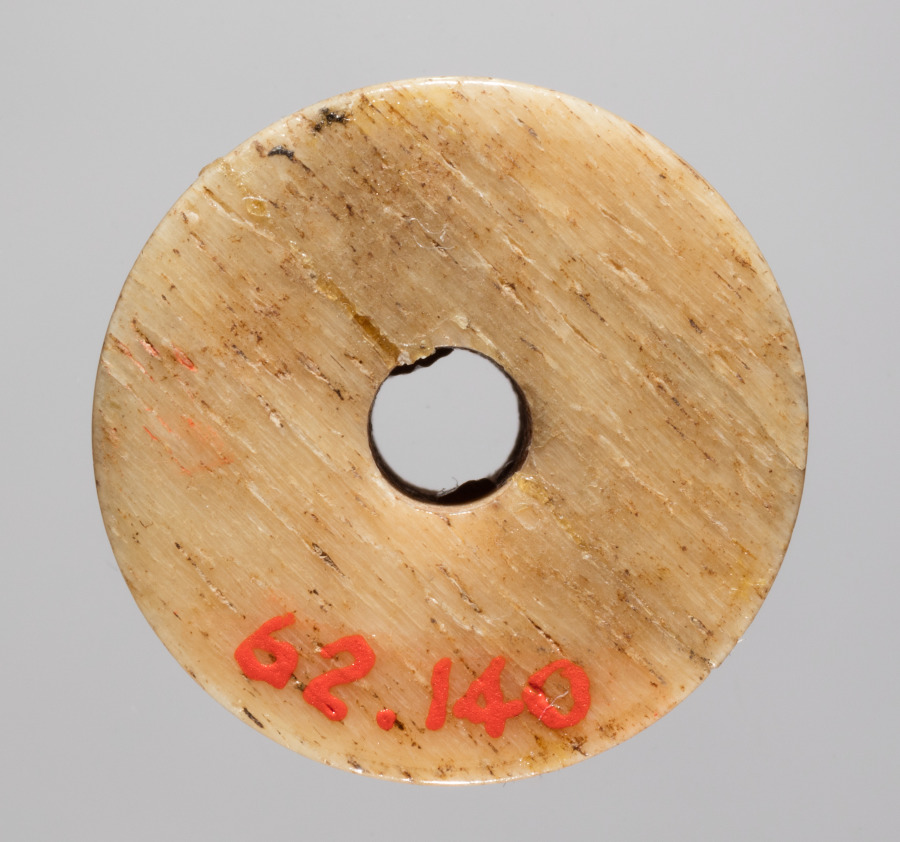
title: Spindle Whorl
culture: Iran, early Islamic period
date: 700s - 900s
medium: bone, incised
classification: Spindle Whorl